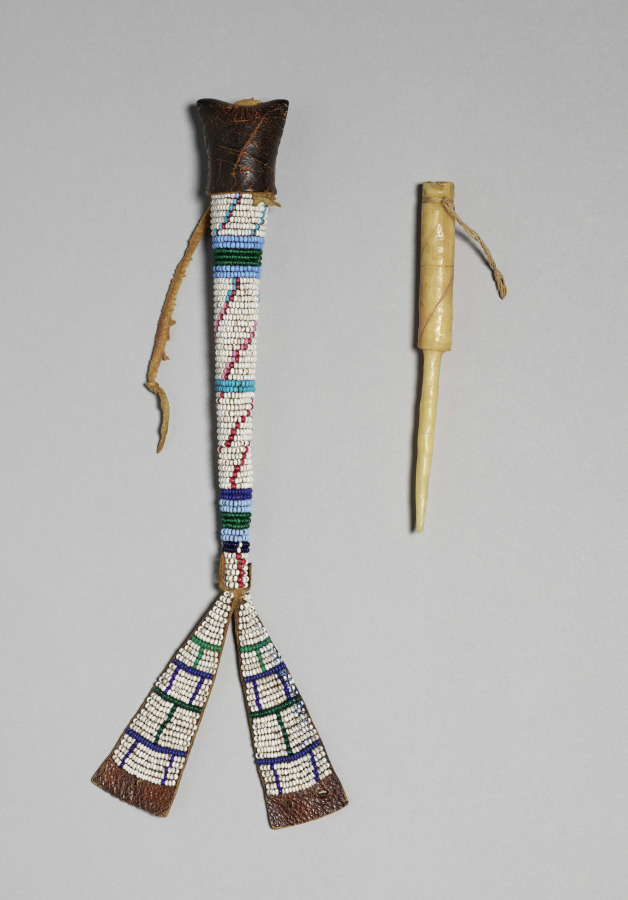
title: Bone Awl with Beaded Case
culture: America, Native North American, Gaigwu (Kiowa), late 19th century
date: late 1800s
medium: bone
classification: Implements